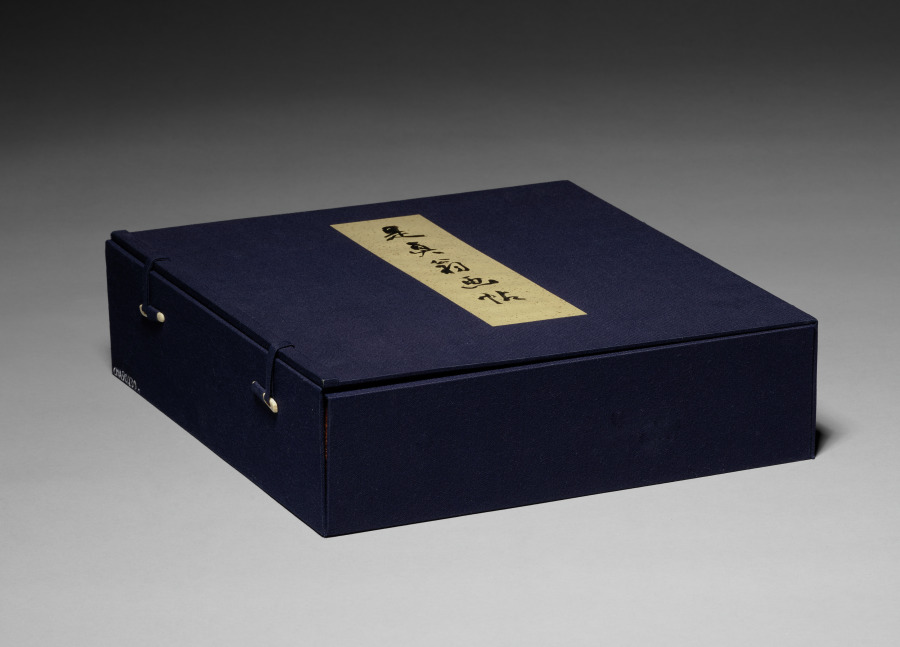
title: Album of Paintings by the Venerable Zeshin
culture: Japan, Edo period (1615–1868)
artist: Shibata Zeshin (Japanese, 1807–1891)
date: 1847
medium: accordion-style album of 12 leaves; ink, color, and gold on silk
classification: Bound Volume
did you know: Textile covers for albums help protect the works of art inside and add to their appeal--the title slip for this album has been left blank.